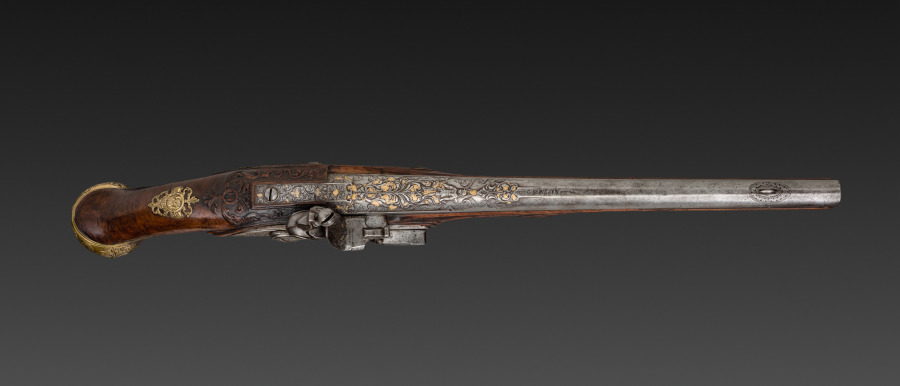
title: Flintlock Pistol (1 of 2)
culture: Franco-Flemish, Liège, early 18th century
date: early 1700s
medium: steel with gold inlay, gilt-brass mounts; walnut burl stock; chiseled high-relief decoration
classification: Arms and Armor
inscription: on barrel: G. MASSIN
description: The exquisite ornament along the breech of the barrel is chiseled and engraved. The barrel of this pistol is signed g. massin, the name of a gunsmith working in eastern France or French-speaking Flanders, possibly the city of Liège.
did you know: The flintlock ignition system was developed in the 1600s and remained the dominant system until the early 1800s.